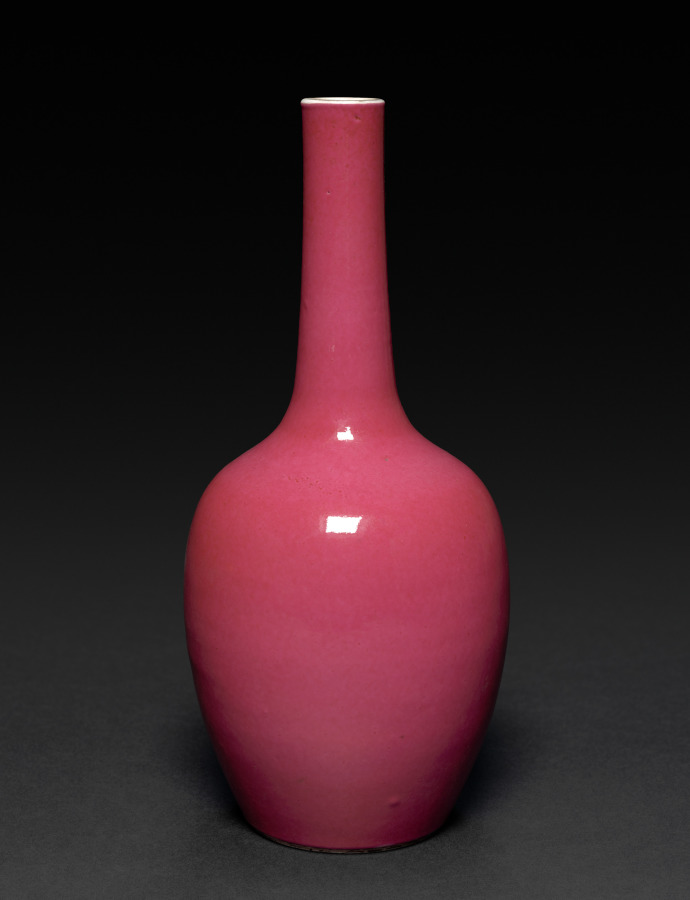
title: Vase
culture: China, Qing dynasty (1644-1911)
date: 1800s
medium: porcelain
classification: Ceramic